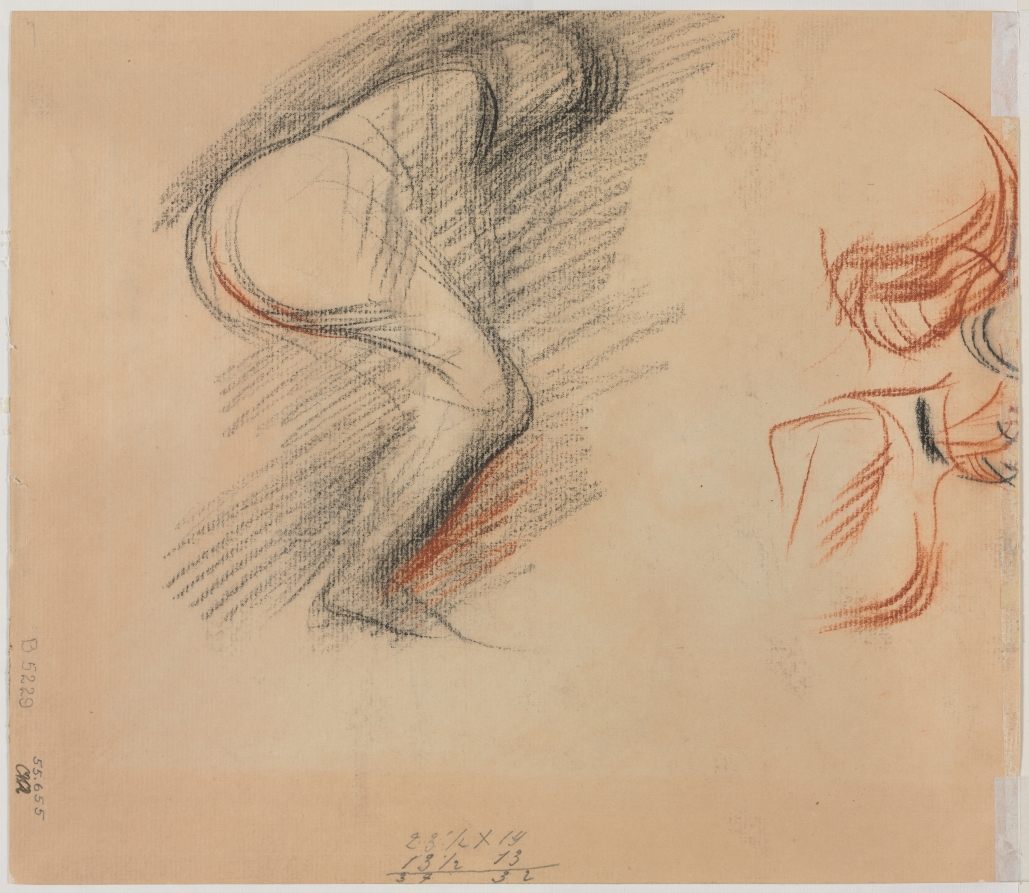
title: Figure Sketches (verso)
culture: France, early 20th Century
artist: Jean Louis Forain (French, 1852–1931)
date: 1906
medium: black and red chalk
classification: Drawing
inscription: lower left, in graphite: B 5229 [sideways] ; lower center, in graphite: 23 1/2 x 14 / 13 1/2 13 [this line underlined] / 34 32